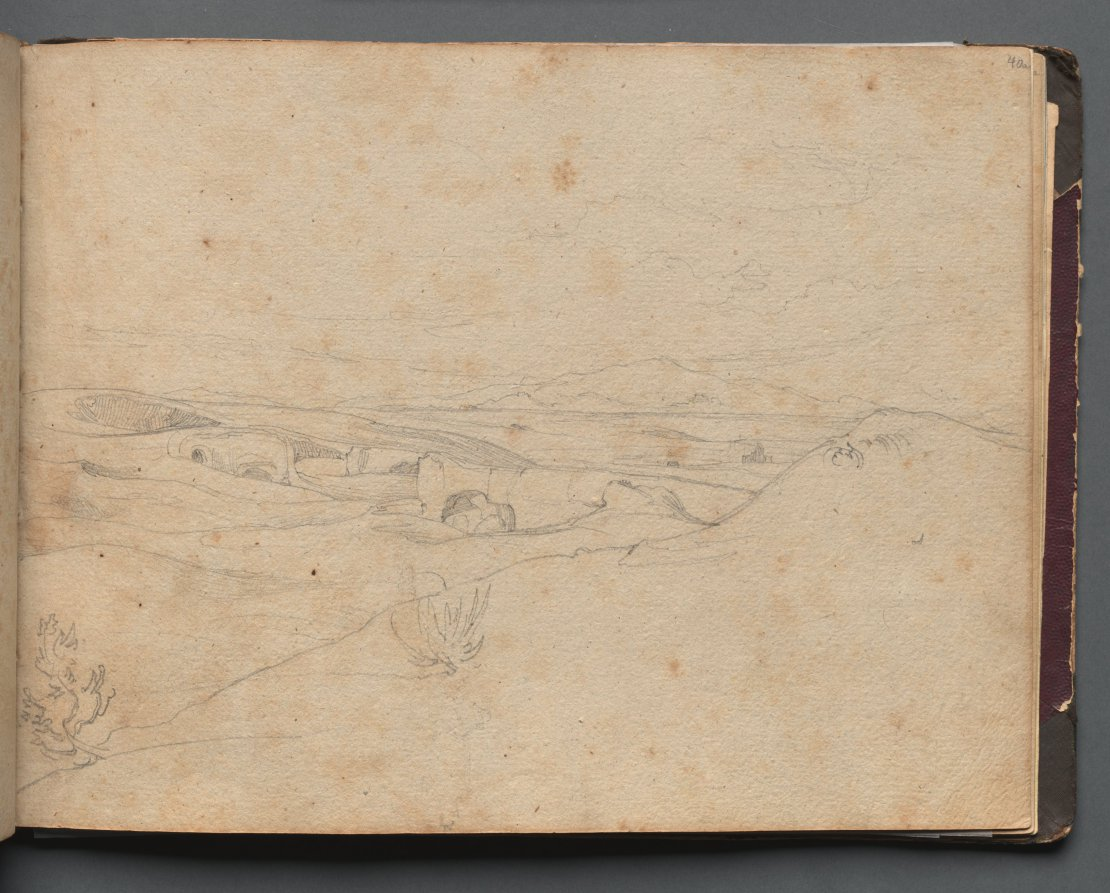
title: Album with Views of Rome and Surroundings, Landscape Studies, page 40a: Roman Landscape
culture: Germany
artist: Franz Johann Heinrich Nadorp (German, 1794–1876)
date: c. 1830s-70s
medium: graphite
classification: Bound Volume